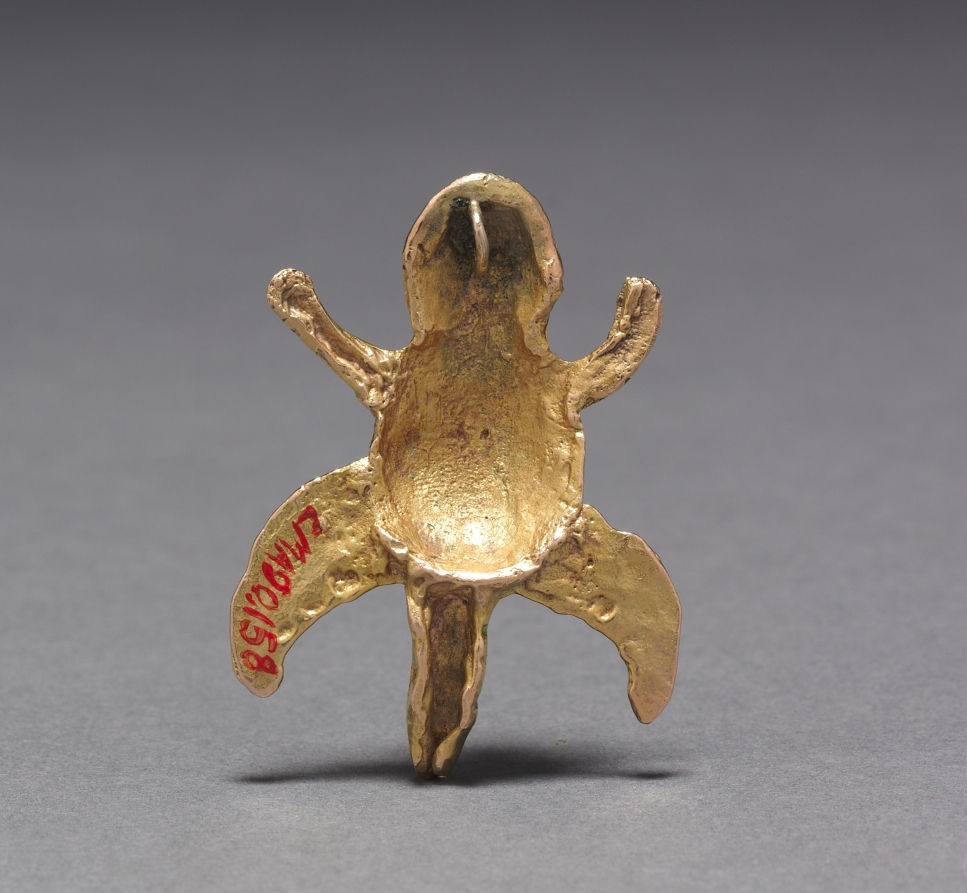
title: Tadpole Pendant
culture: Panama, Veraguas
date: 800–1500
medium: cast gold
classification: Metalwork